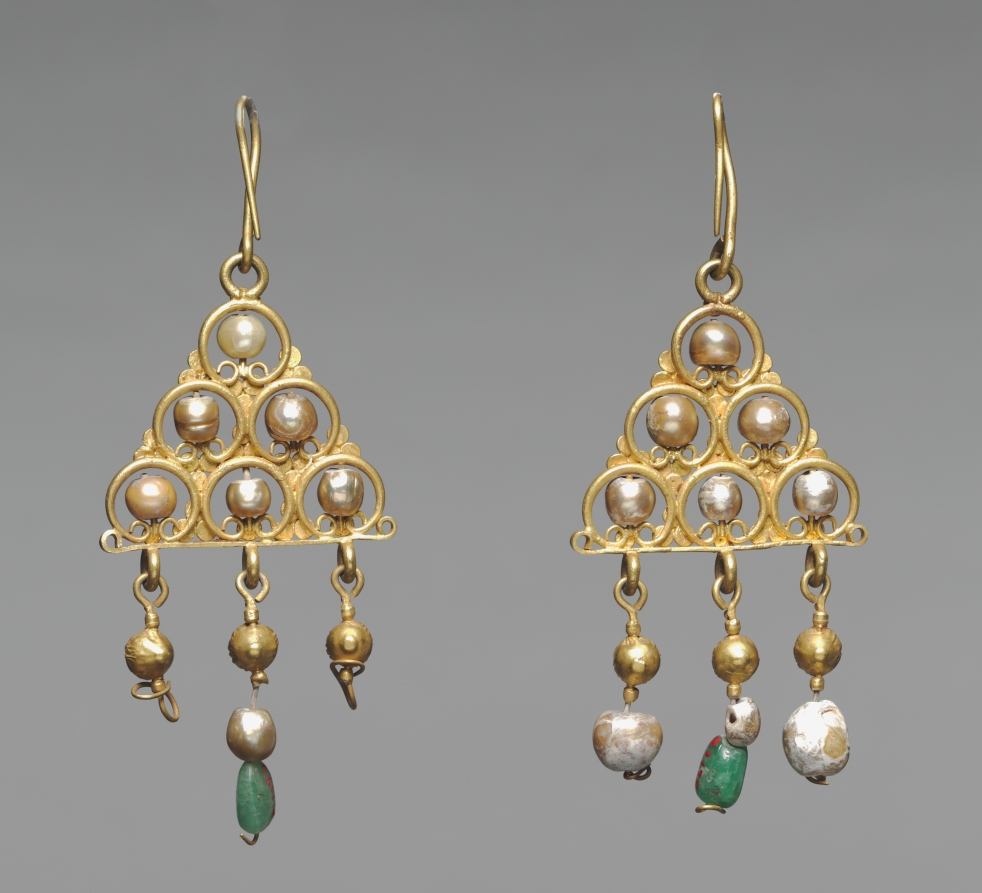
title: Earrings (pair)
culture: Byzantium, early Byzantine period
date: 600s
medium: gold, pearls, glass, and emeralds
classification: Jewelry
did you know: This piece of jewelry was worn by a woman in the fashionable courts of Byzantium. Decorated with pearls, glass, and emeralds, these gold earrings are delicate, yet eye-catching. Do you think these chandelier-style earrings would be fashionable today?